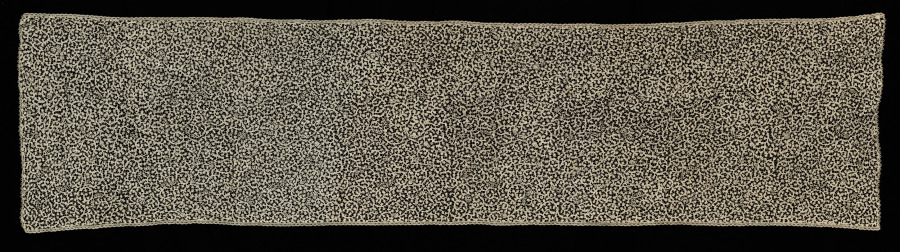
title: Lace Flounce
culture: Flanders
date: 1700s–1800s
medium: Linen: bobbin lace (resembles coralline point)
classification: Lace